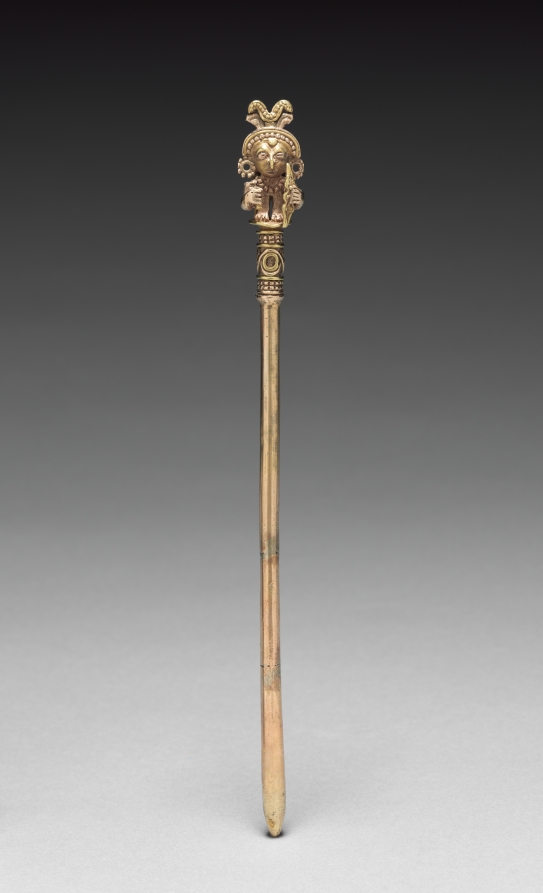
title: Lime Dipper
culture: Colombia, Calima region, Yotoco style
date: c. 1–800 CE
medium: gold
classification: Metalwork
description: Coca-leaf chewing was a widespread ritual in ancient South America. Utensils included a container and a dipper or spoon for powdered lime (made from seashells), added to the coca to enhance its gentle, stimulating effect. Colombian cultures are especially known for transforming these utensils into works of art made of precious metal. The image on the tallest dipper is wonderfully complex. A serpent coils at the bottom, beneath a snarling animal with a huge, vertical tail. This animal has a tiny monkey on its back; the monkey also has a huge tail, which rests on the first animal’s head like a headdress. This intricate image was created with the lost-wax casting process.